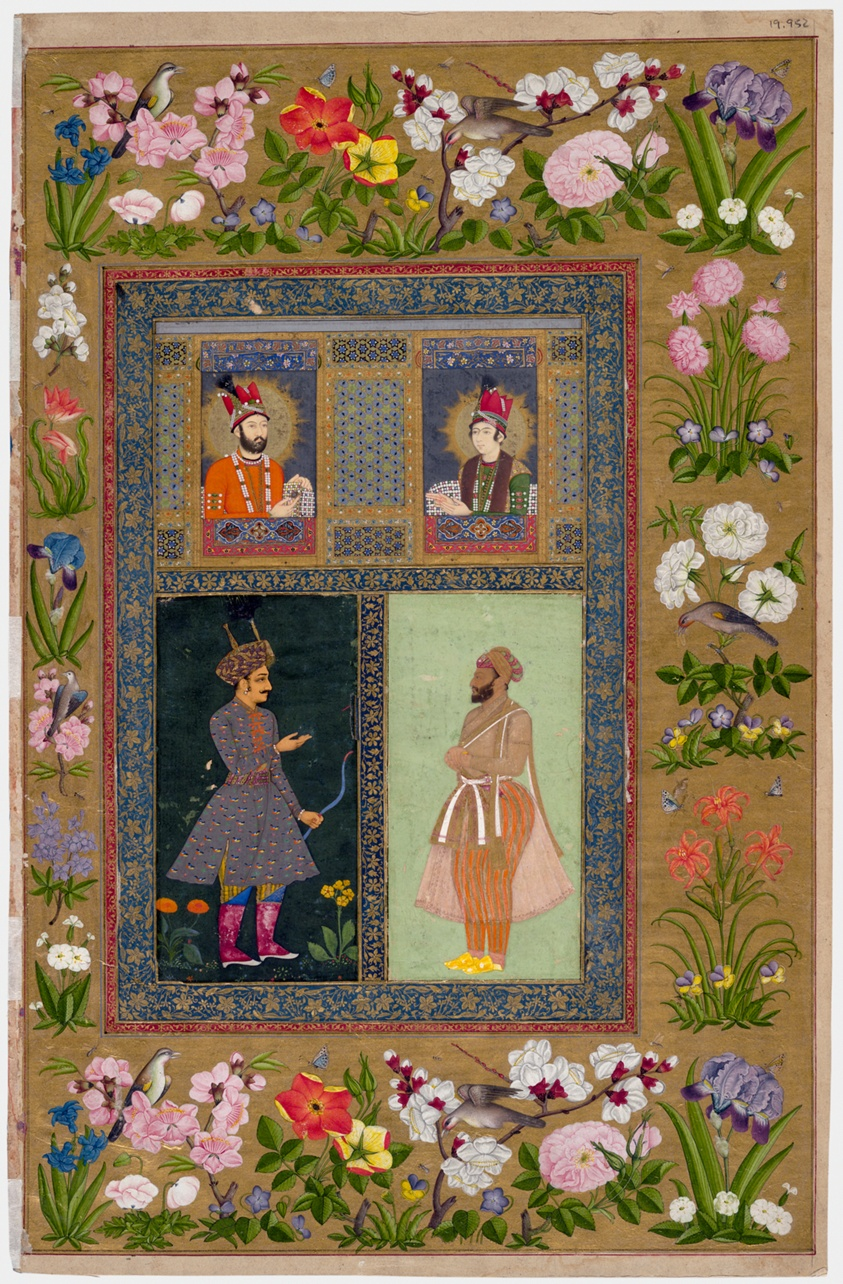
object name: Drawing and Watercolor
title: Page from the St. Petersburg Album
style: Islamic (culture or style)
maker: India and Iran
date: Portraits: Top left: Iran, c. 1740; top right: Iran, c. 1748; bottom left: India, 18th century; bottom right: India, 18th century; Calligraphy: Iran, late 16th century; Borders: Iran, mid–18th century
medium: Opaque watercolor, silver, and gold on paper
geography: India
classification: watercolor; painting; asian art